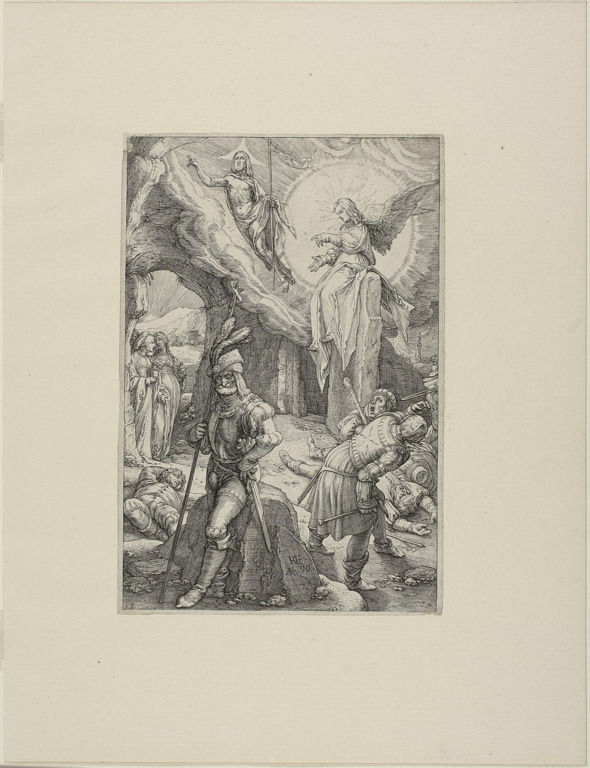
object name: Print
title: The Resurrection, plate twelve from The Passion of Christ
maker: Hendrick Goltzius (Dutch, 1558-1617)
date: 1596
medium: Engraving in black on cream laid paper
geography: Netherlands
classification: engraving; paper; print; prints and drawing